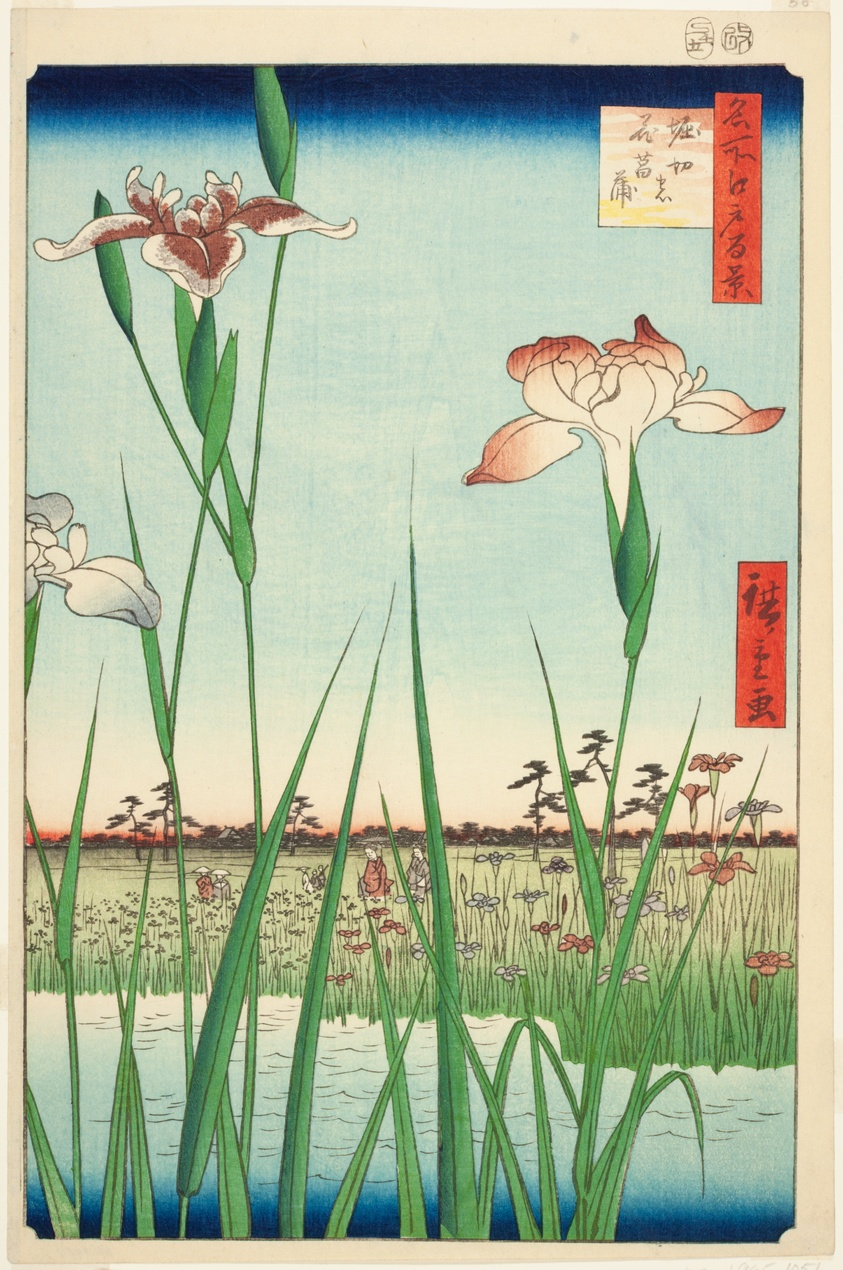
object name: Print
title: Irises at Horikiri (Horikiri no hanashobu), from the series "One Hundred Famous Views of Edo (Meisho Edo hyakkei)"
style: Japanese (culture or style)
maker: Utagawa Hiroshige 歌川 広重; Japanese, 1797-1858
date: 1857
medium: Color woodblock print; oban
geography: Japan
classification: woodblock print; print; asian art